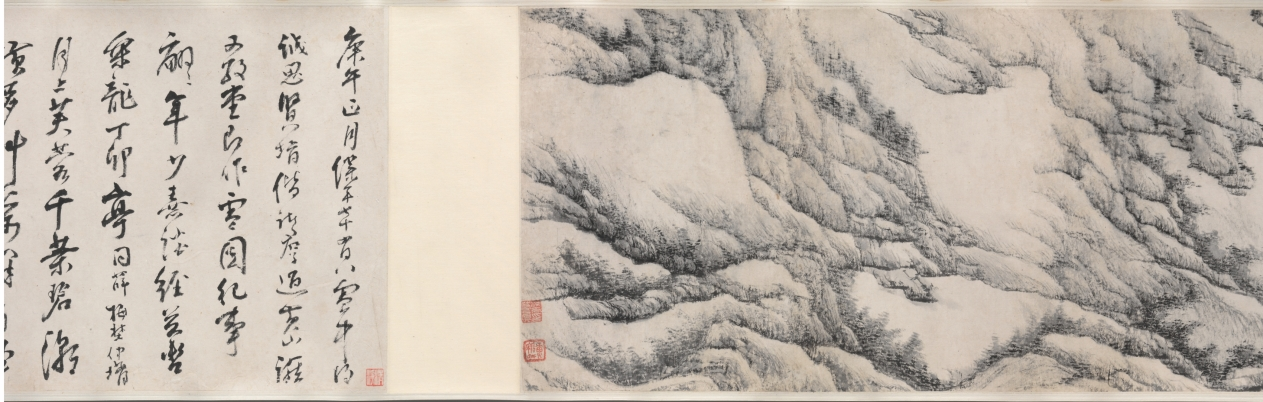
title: Snow Coloring the World White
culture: China, Qing dynasty (1644-1911)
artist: Fa Ruozhen (Chinese, 1613–1696)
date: 1690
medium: handscroll, ink on paper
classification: Painting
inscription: Artist's title on frontispiece, colophon with 6 poems, and 7 seals: [seal] Ch'ien-k'un i ts'ao t'ing. Snow Coloring the World White. Huang-shan lao-jen, Jo-chen, at the age of seventy eight. [2 seals] Fa yin Jo-chen; Huang-shih shih. (Artist's poems are not translated.) In the first month of the keng-wu year [1690], 1 was seventy-eight years old. On a snowy day I was pleased to have my good son-in-law Ch'eng-ssu and other gentlemen visiting me at my Tz'u-ching Hall at Yellow Hill. I did this snowscape to record the event. [2 seals] Fa Jo-chen; Tun Chai. [2 seals at end of painting] Fa yin Jo-chen; Huang-shih shih. trans. LYSL/WKH 12 additional seals: 8 of Ho Kuan-wu (20th c.); 1 of Wang Nan-p'ing (20th c.); 3 unidentified.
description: Fa Ruozhen was a scholar-official and prolific poet who focused on painting as his government career declined. The inscription records that he was 78 years old when he painted this handscroll to welcome visitors on a snowy day. At this point in his artistic development, Fa created expressive landscapes and experimented with unconventional brushwork. This handscroll begins at the right with gentle hills dotted with evergreens and bare deciduous trees. By the end, the twisting rocky forms dominate. Fa’s official career spanned the fall of the Han Chinese Ming dynasty (1368–1644) and the rise of the Manchurian Qing dynasty (1644–1911). While other scholar-officials who declined to serve the Manchus had their reputations enhanced, critics accused Fa of disloyalty for serving in the new bureaucracy. Fa was deeply sensitive about this criticism. In many of his 4,000 known poems, he responded by emphasizing the Confucian virtue of being a good administrator particularly during an unstable time. Fa’s “disorderly” brushwork and distressed landscapes seem to reflect the political upheaval of his era.